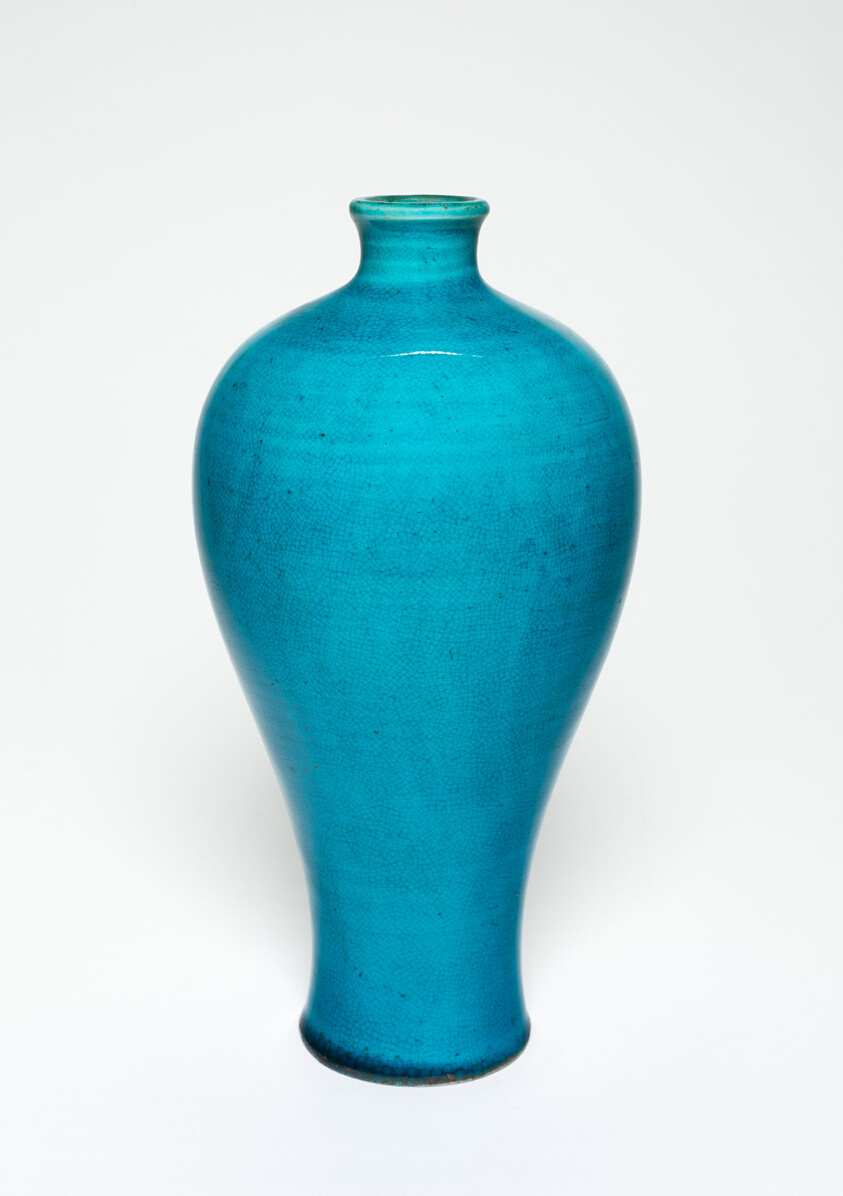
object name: Vessel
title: Bottle Vase (Meiping)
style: Chinese (culture or style)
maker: China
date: Qing dynasty (1644–1911), Qianlong period (1736–1795)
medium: Porcelain with turquoise glaze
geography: China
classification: vase; vessel; porcelain; ceramics; asian art